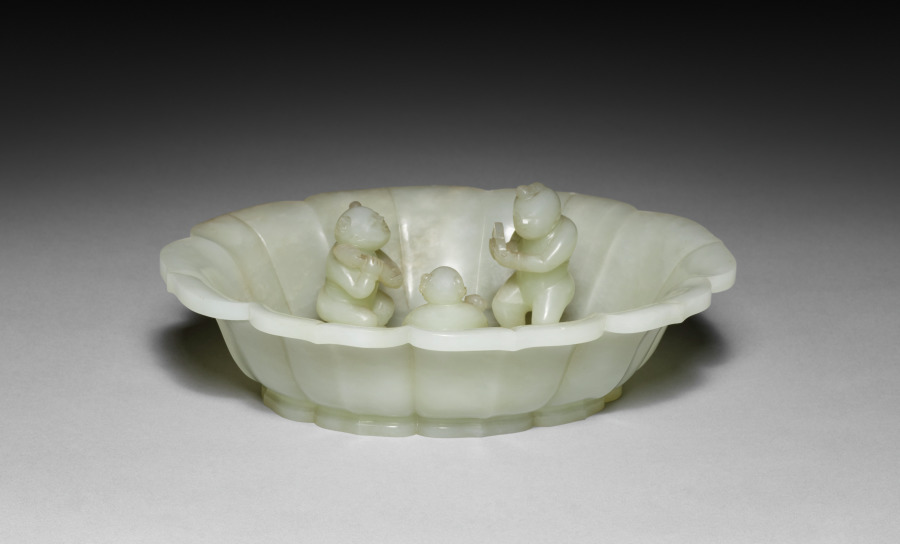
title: Octofoil Dish with Three Boys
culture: China, Qing dynasty (1644–1911), Qianlong reign (1736–95)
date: 1700s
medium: jade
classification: Jade